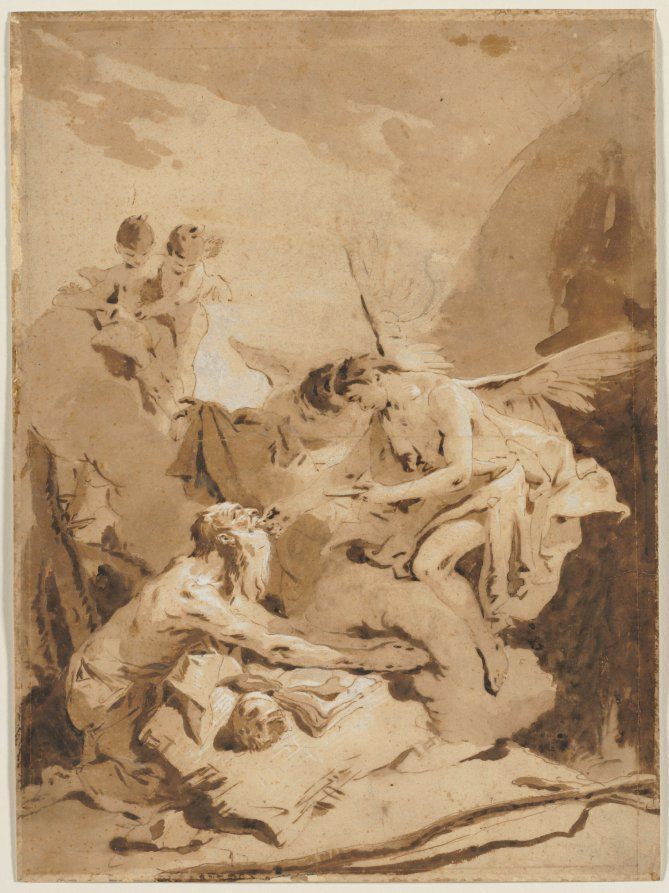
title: The Last Communion of St. Jerome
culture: Italy, 18th century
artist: Giovanni Battista Tiepolo (Italian, 1696–1770)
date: c. 1726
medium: pen and brown ink and brush and brown wash over traces of black chalk heightened with lead white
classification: Drawing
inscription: VERSO, center right, in graphite: Marge blanche / plat [underlined] ; lower right, in brown ink: Cabinet de Julien de parme et de N. / J. B. Tiepolo invt fecit